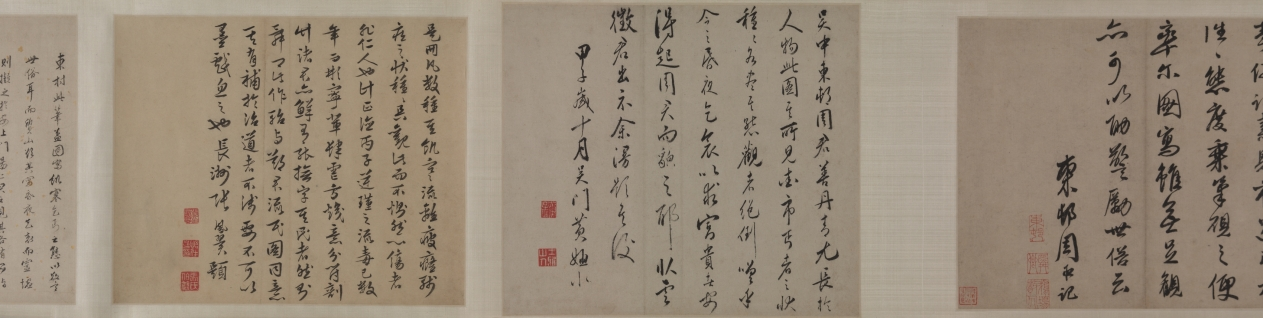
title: Beggars and Street Characters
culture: China, Ming dynasty (1368–1644)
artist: Zhou Chen (Chinese, c. 1450–c. 1536)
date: 1516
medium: Handscroll; ink and light color on paper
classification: Painting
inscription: 題: 周臣流氓圖. 古堇趙鶴琴 [印] 老鶴臨池; 鵝池軒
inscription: 正德丙子秋七月，閒窗無事 ，偶記素見市道丐者種種態度。乘筆硯之便，率爾圖寫。雖無足觀，亦可以助警勵世俗云。 東邨周臣記 [印]東邨; 舜卿; 鵝場散人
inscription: 吳中東邨周君，善丹青，尤長於人物。此圖其所見盛市丐者之狀種種，各盡其態，觀者絕倒。嗟乎，今之晝夜乞哀以求富貴者，安得起周君而貌之耶。臥雲徵君出示，余漫題其後。 甲子歲十月吳門黃姬水 [印] 士雅山人; 另一印不詳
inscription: 是冊凡數種。其飢寒流離疲癃殘疾之狀，種種之異。觀此而不惻然心傷者，非仁人也。計正德丙子逆瑾之流毒已數年。而[江]彬 [錢] 寧輩肆虐方熾。意分符剖竹諸君，亦鮮有能撫字其民者。然則舜卿此作，殆與鄭君 流民圖同意。其有補於治道者不淺，要不可以墨戲忽之也。 長洲張風翼題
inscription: 東村此筆，蓋圖寫飢寒乞丐之態，以警世俗耳。而質山 [黃姬水]欲其寫昏夜乞哀，而靈墟[張鳳翼]則擬之於安上門圖。二君之見，其各有所指哉。昔唐六如每見周筆，輒稱曰：周先生！蓋深服其神妙之不可及。若此冊者，信非他人可能而有符於六如之心伏矣。豈易得耶。若黃、張之指，則又論於畫之外，不在於形似筆墨之旨也。 萬歷丁丑十二月三日 茂苑文嘉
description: Zhou Chen from Suzhou provides rare depictions of impoverished people that once filled the city’s markets and streets. Despite Suzhou’s prosperity, its rapid growth polarized society, including the wealthy and those who had deserted their farmlands, who were without homes, unemployed, or sick. Amid these are figures who inspire fear rather than empathy. The painting may thus be informed by local practices at the end of the lunar year, in which street beggars, in exchange for food or money, would dress up like ghosts and demons to drive out evil forces.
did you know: Although Zhou Chen's original composition was an album of 24 figures, today it is mounted as two handscrolls, one in the Cleveland collection and one in the Honolulu Museum of Art.